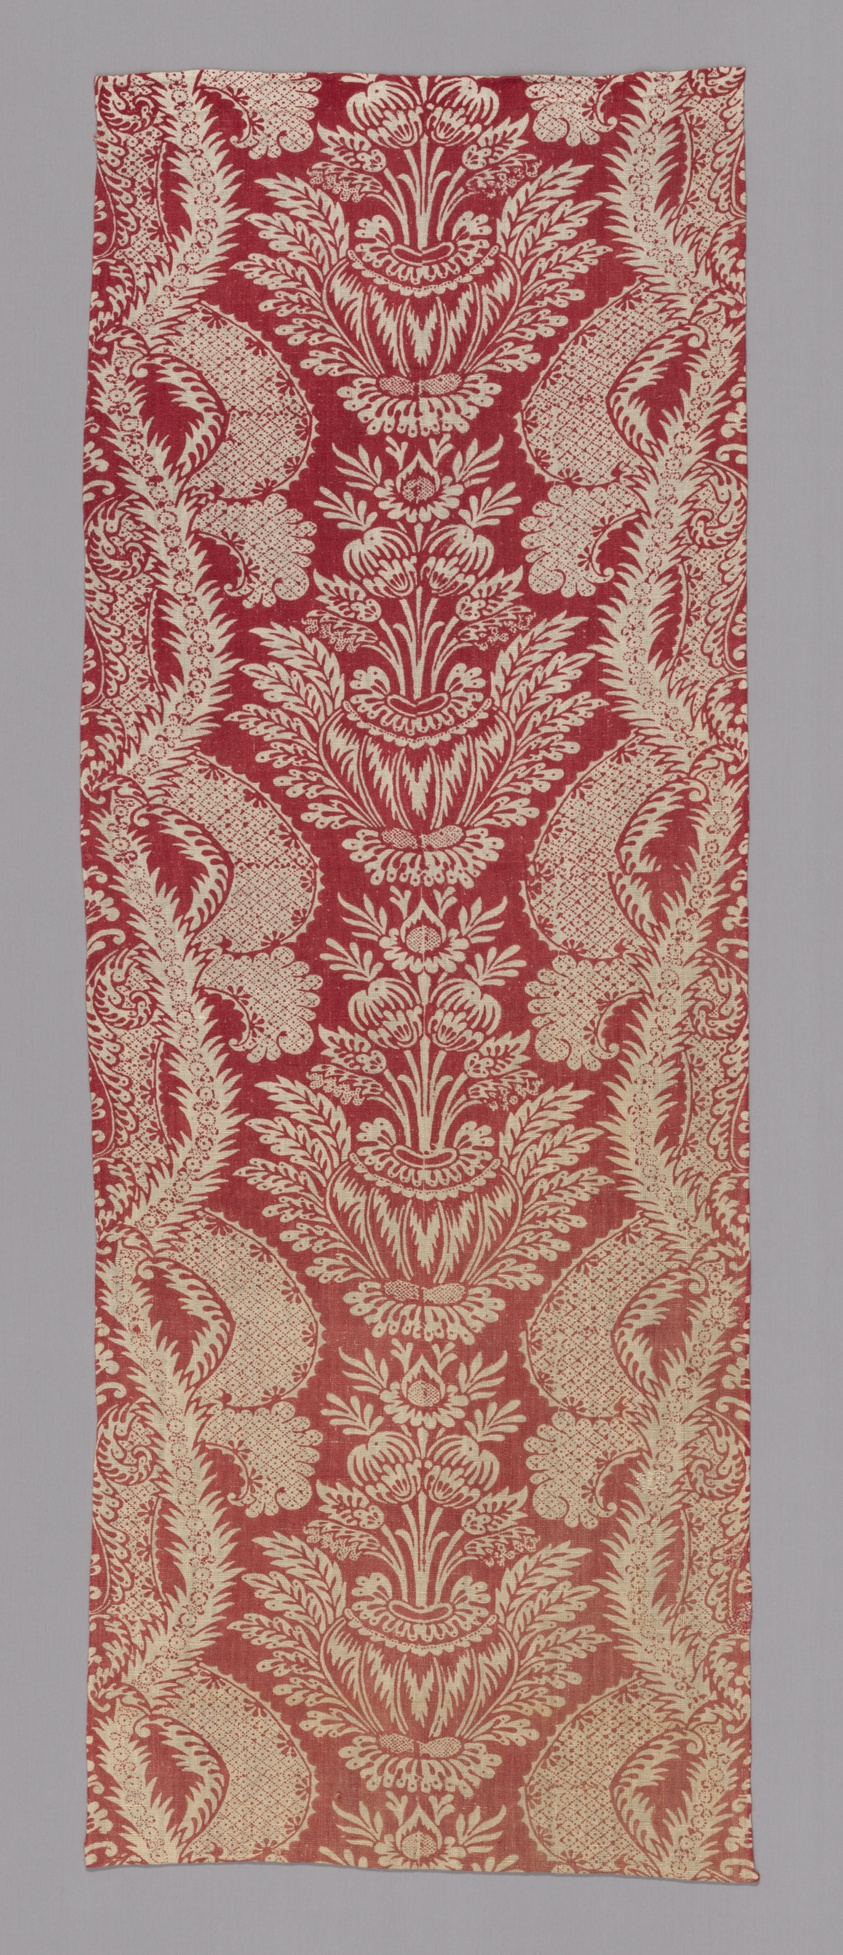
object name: Textile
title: Panel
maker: France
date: c. 1830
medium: Cotton, plain weave; block printed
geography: France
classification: textile; weaving - printed; printed textile